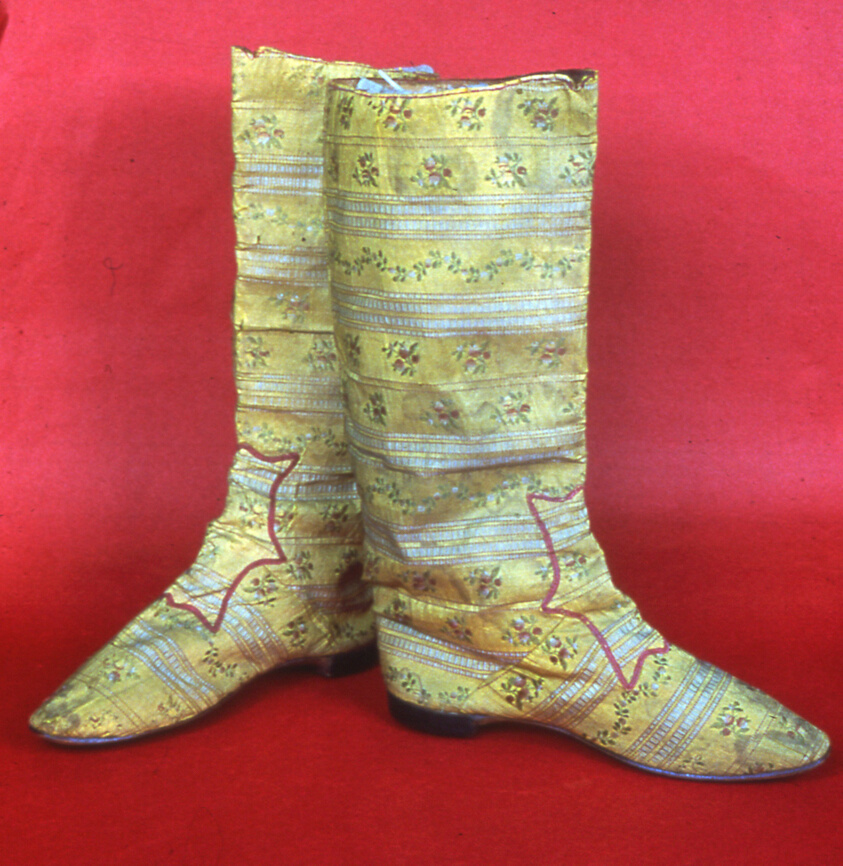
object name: Textile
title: Pair of Boots (Theatrical)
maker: France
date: 1870s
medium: Silk, plain weave; brocaded; leather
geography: France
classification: textile; shoes - weaving; costume accessory - shoe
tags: flowers, yellow (color), white (color), red (color)